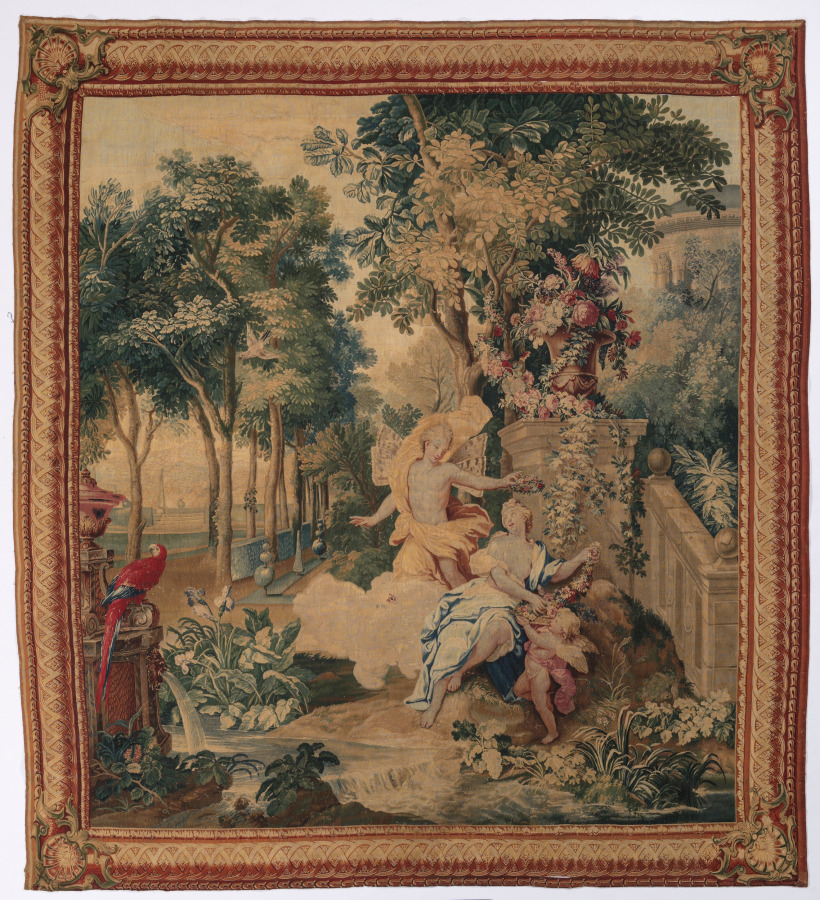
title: Flora and Zephyrus (from Set of Ovid's Metamorphoses)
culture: France, 18th century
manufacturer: Gobelins Manufactory (France, Paris, est. 1662)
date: 1704–1731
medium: tapestry weave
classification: Tapestry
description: In an abundant garden of trees and flowers, the goddess Flora sits beneath a vase of luscious flowers as her husband, the west wind Zephyrus, carried by a white cloud, reaches out to crown her with a floral chaplet. In this tapestry, Zephyrus’s wings resemble those of a butterfly or moth rather than a bird. The ravishing landscape echoes Flora and Zephyrus as springtime divinities. The parrot in the foreground is a colorful intermediary between the viewer and the gods represented in this tapestry.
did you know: During the French Revolution, Gobelins tapestries were sometimes disassembled to harvest the gold threads.